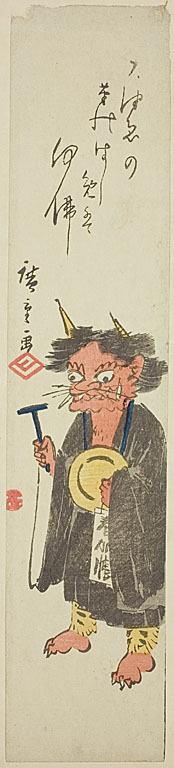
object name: Print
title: Demon Reciting Buddhist Prayers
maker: Utagawa Hiroshige 歌川 広重; Japanese, 1797-1858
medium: Color woodblock print, tanzaku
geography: Japan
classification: woodblock print; print; asian art